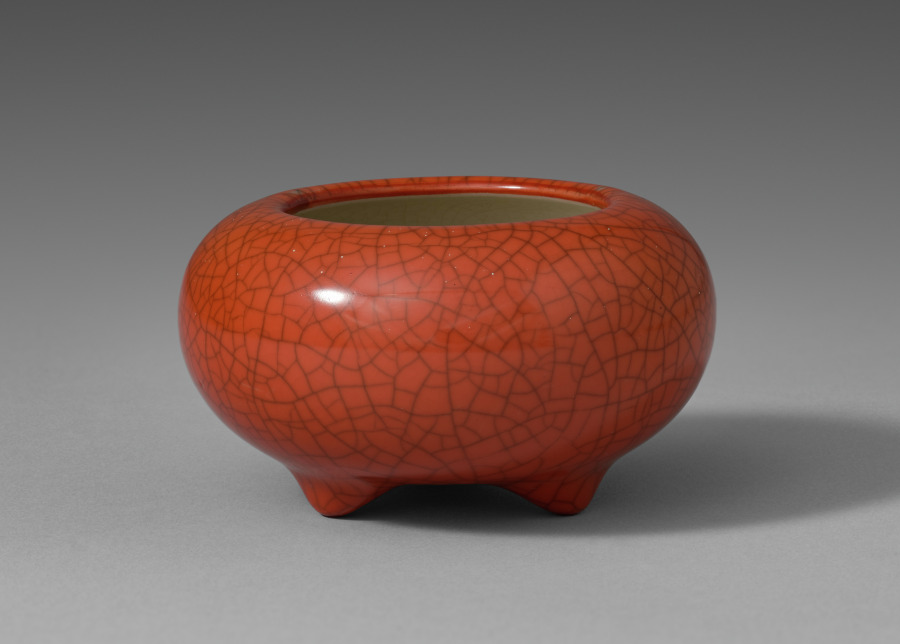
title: Incense Burner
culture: Japan, Meiji period (1868–1912)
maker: Seifū Yohei III (Japanese, 1851–1914)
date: 1893–1914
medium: Porcelain with coral red and crackled glaze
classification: Ceramic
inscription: 清風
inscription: "Hyatt King"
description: The tiniest of containers, this ovoid tripod is an incense burner. It likely once had an openwork metal lid. It is remarkable for its coral red color and crackled glaze. In contrast to the exterior, the interior has been left white under a transparent glaze. The “coral red glaze” is one Yohei III developed in 1887 and called sangōyu. Sensational among colors known at that time, Yohei III won first prize for his work glazed with it at the annual exhibition of the Japan Art Association (Bijutsu Kyokai) in 1888.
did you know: Seifū Yohei III’s incense burner has a red glaze that is difficult to achieve.